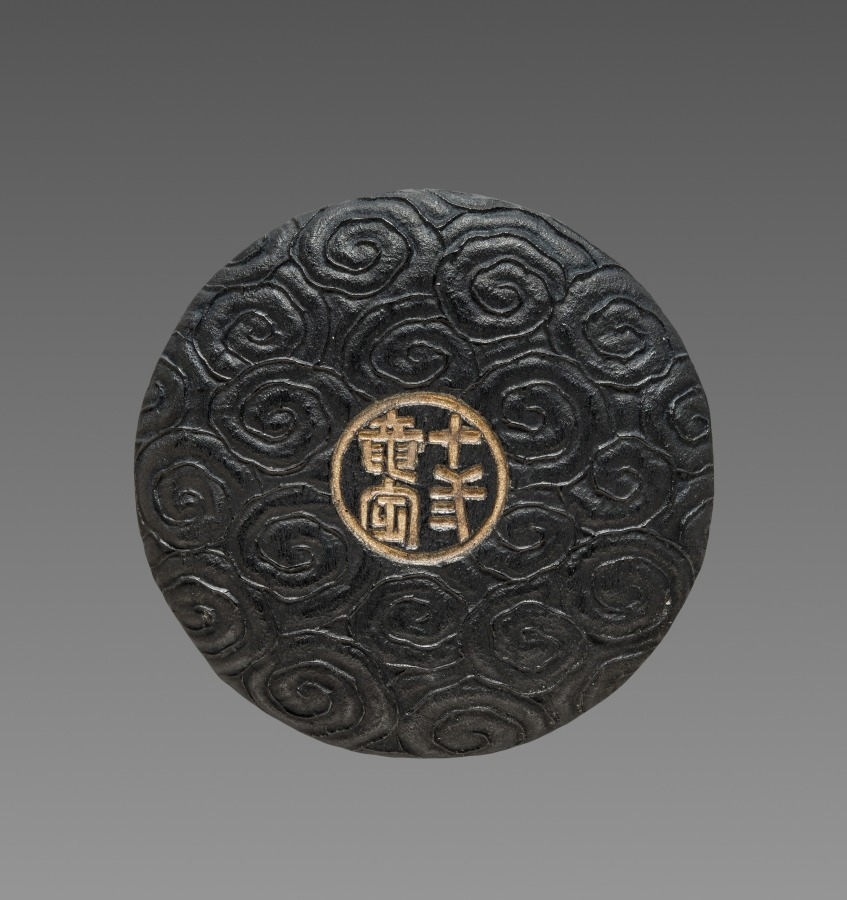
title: Ink Cake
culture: China, Qing dynasty (1644-1911)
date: 19th Century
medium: ink cake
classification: Miscellaneous